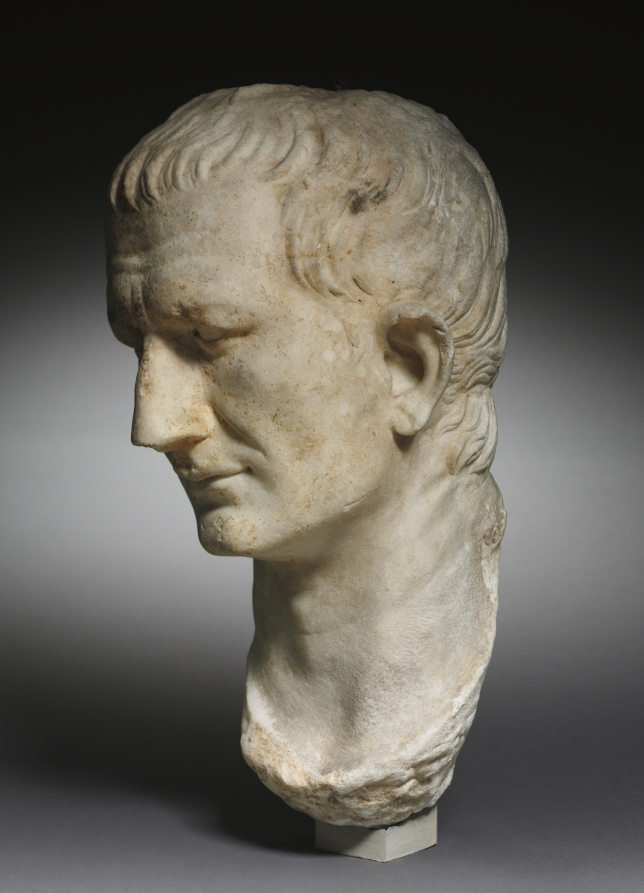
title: Portrait Head of Emperor Vespasian, Recut from Head of Nero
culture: Italy, Roman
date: 64–79 CE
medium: marble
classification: Sculpture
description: Although this portrait head was designed to fit into a statue of a body, it did not originally belong with the togate body that held it when purchased by the museum in 1929. In 1973, the two were separated, and the body is now in storage. The head itself was recarved in antiquity, from a likeness of Nero to one of Vespasian, following the damnatio memoriae (condemnation of memory) of the former. A line at the back of head shows clearly where the long hair of Nero has been shortened, while other Neronian features, such as a receding lower lip, remain.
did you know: Originally a portrait of Emperor Nero, this head was recarved after his damnatio memoriae (condemnation of memory).